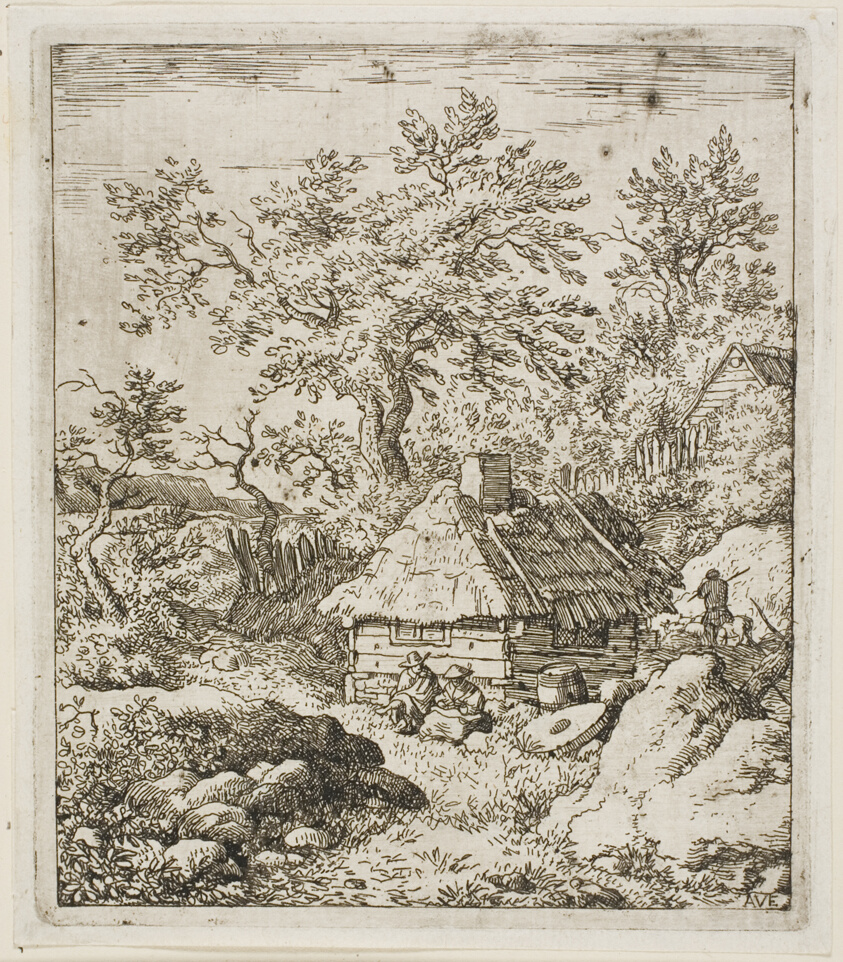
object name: Print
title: Thatched Hut among Trees and Rocks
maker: Allart van Everdingen; Dutch, 1621-1675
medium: Engraving on paper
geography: Holland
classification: etching; print; prints and drawing